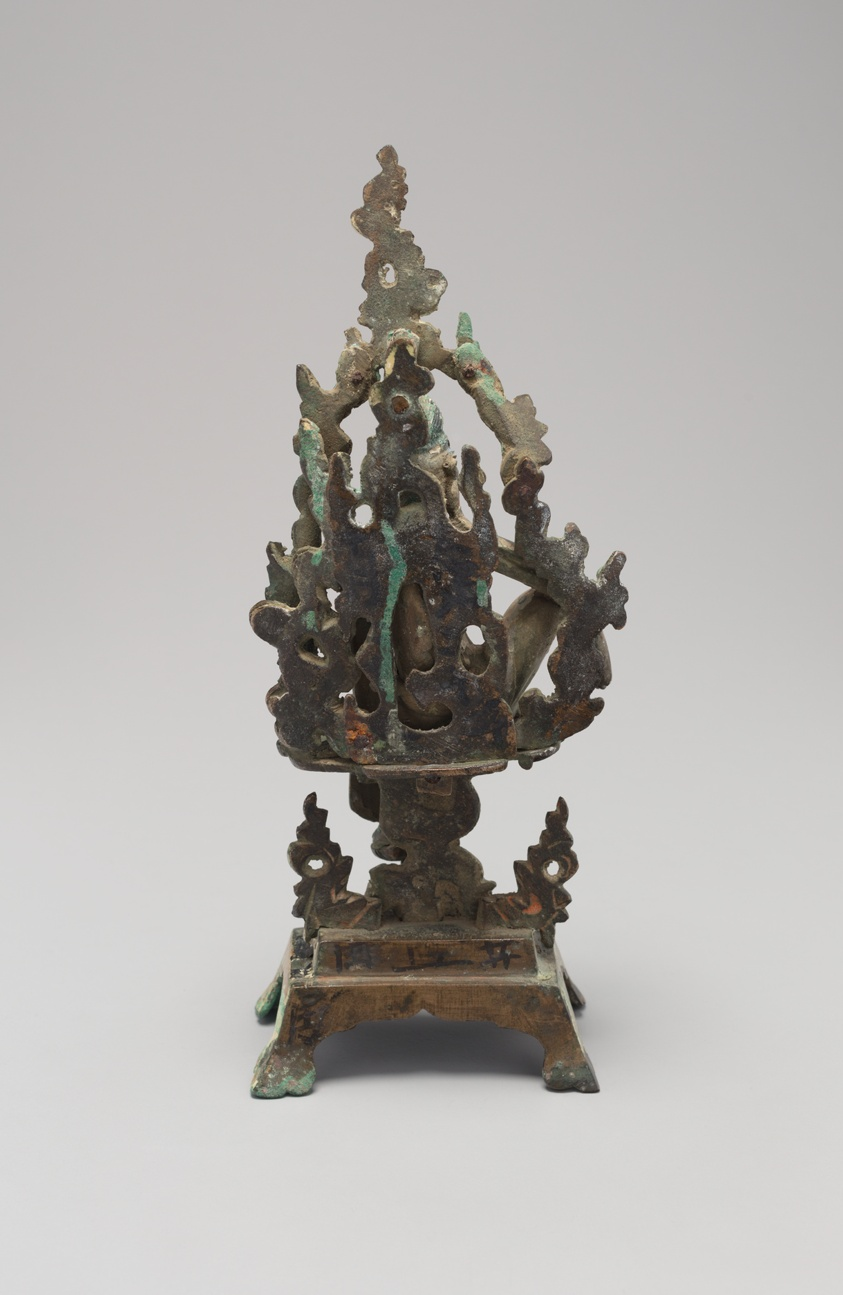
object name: Sculpture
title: South Sea Guanyin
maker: China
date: Song dynasty (960–1279)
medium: Gilt bronze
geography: China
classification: sculpture